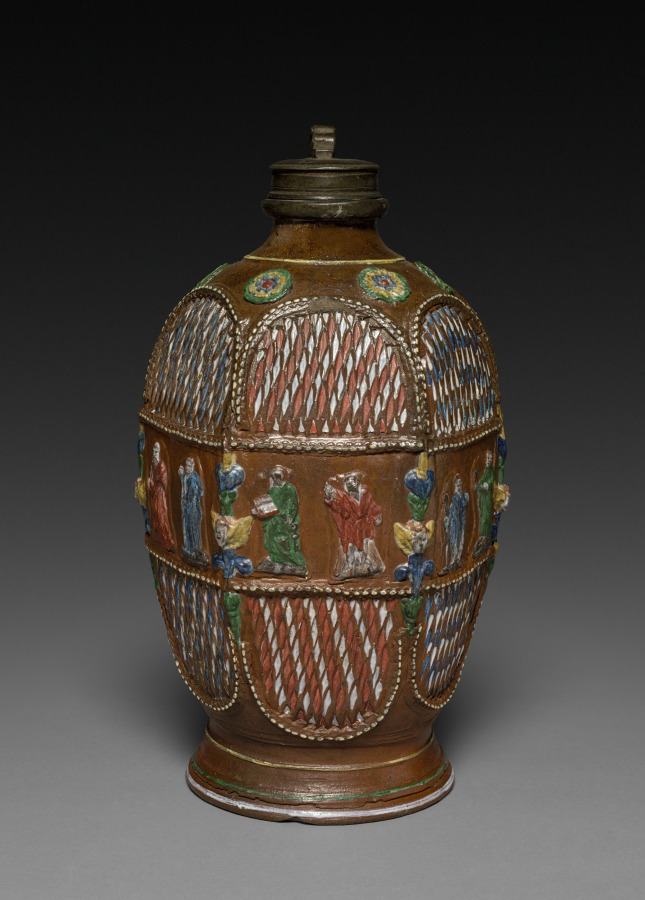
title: Bottle (Schraubflasche)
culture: German, Bavaria, Kreussen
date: c. 1660–80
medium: salt-glazed stoneware, applied and impressed decoration, pewter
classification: Ceramic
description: Bottles or jars (kruken) of this type of six-sided form are most often associated with the ceramic tradition found in Kreussen (now Creussen) in the Bavarian region of Germany during the mid to late 1600s. With a threaded neck fitted with a pewter screw top and ring, they were ideal vessels for medicinal liquids as they could be easily connected to a belt for transport to the patient. Applied decoration depicting the twelve apostles, as on this example, allude to the spiritual nature of healing.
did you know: The applied decoration on this bottle depicts the twelve apostles.